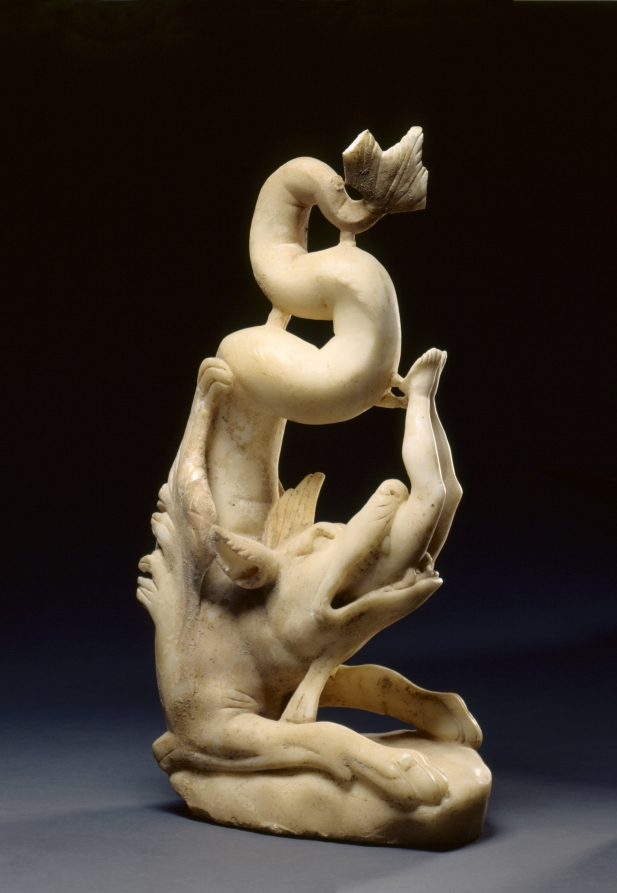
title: Jonah Swallowed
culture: Anatolia, late Roman-early Christian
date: 280–90 CE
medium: marble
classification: Sculpture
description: After disobeying the Lord’s command to proclaim judgment on the city of Nineveh, the Old Testament prophet Jonah was cast into the sea and swallowed by a sea monster. Here, the beast swallows Jonah headfirst.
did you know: Although usually thought of as a whale, here the artist has depicted Jonah swallowed by a cetus, a large, monstrous sea creature.